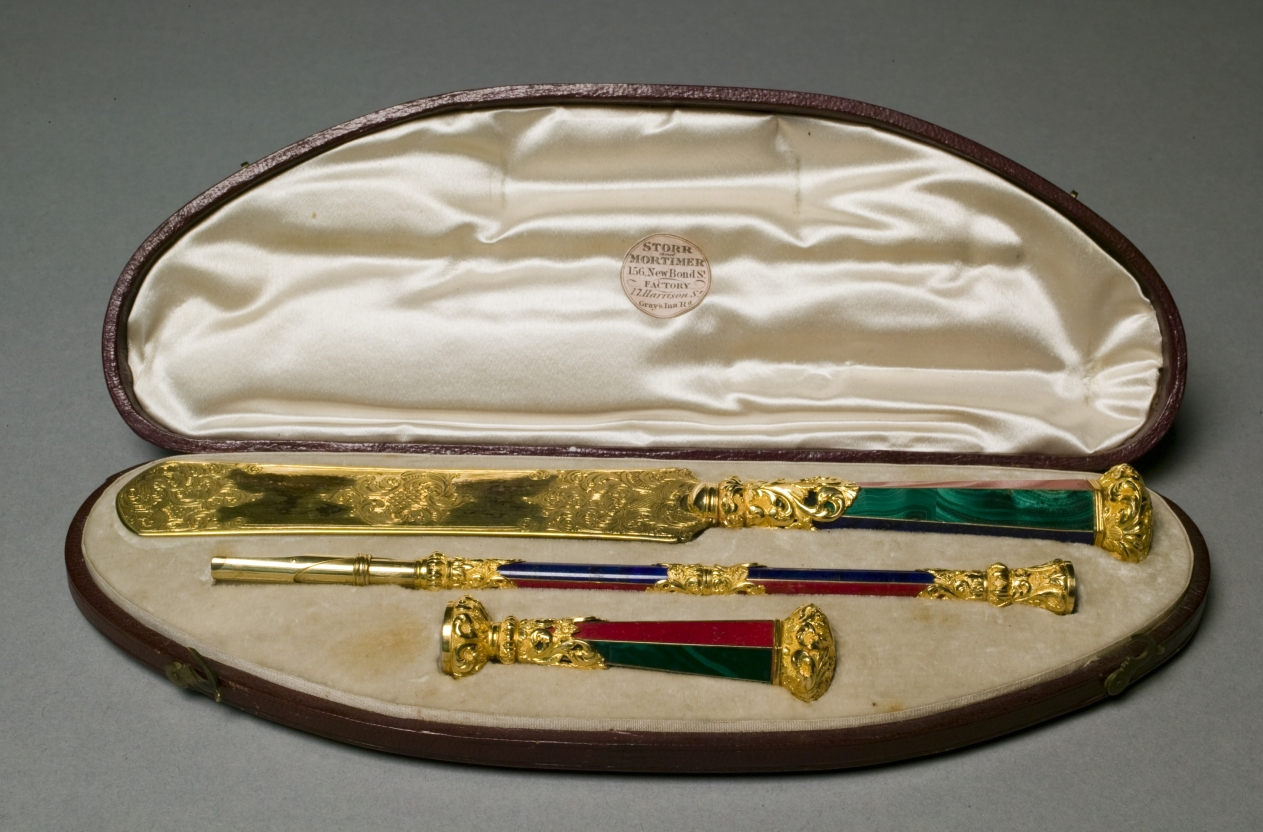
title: Writing Set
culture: England, mid-19th century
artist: John Hamilton Mortimer (British, 1740–1779)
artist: and Paul Storr (British, 1771–1844)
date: c. 1830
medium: hardstones including lapis lazuli, malachite, carnelian, agate, gold; original fitted velvet-lined case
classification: Miscellaneous